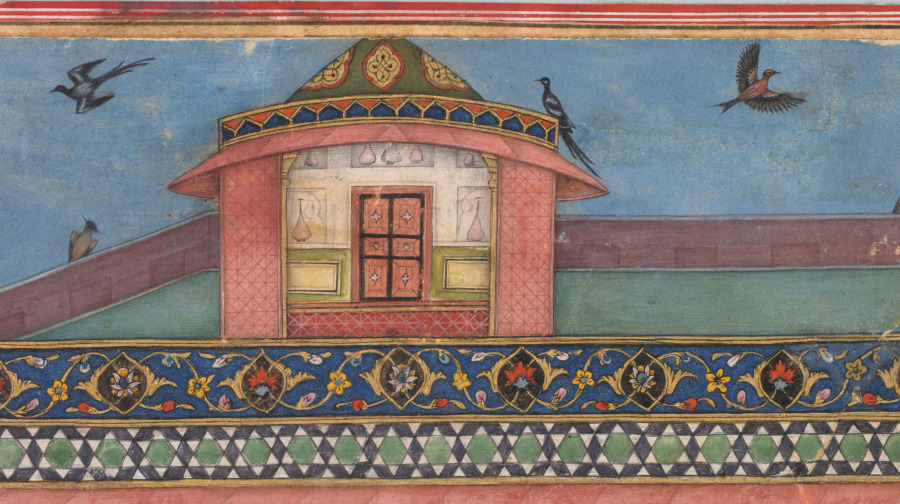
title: A Royal Picnic on a Terrace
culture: Mughal India, court of Akbar (reigned 1556–1605)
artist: attributed to Muhammad Ali (Persian, active 1590–1620)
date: c. 1620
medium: Gum tempera and gold on paper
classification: Painting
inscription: later Hindi inscription on reverse: Babur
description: A richly patterned carpet spans the width of the composition and forms the setting for a royal visit. The status of the highest-ranking person is indicated by the tan cloth placed over the carpet and the voluminous wine-colored cushion ornamented with stylized gold clouds. An attendant holding an emblem of Indian royalty, the fly whisk, stands to one side. At the far right of the carpet are two books, indicating that they are learned men. Like the carpet, the book covers have central medallions and borders, in line with the Persian aesthetic that the Mughals of India held in high regard.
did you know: A gentleman connoisseur has tucked a flowering sprig into his voluminous turban.